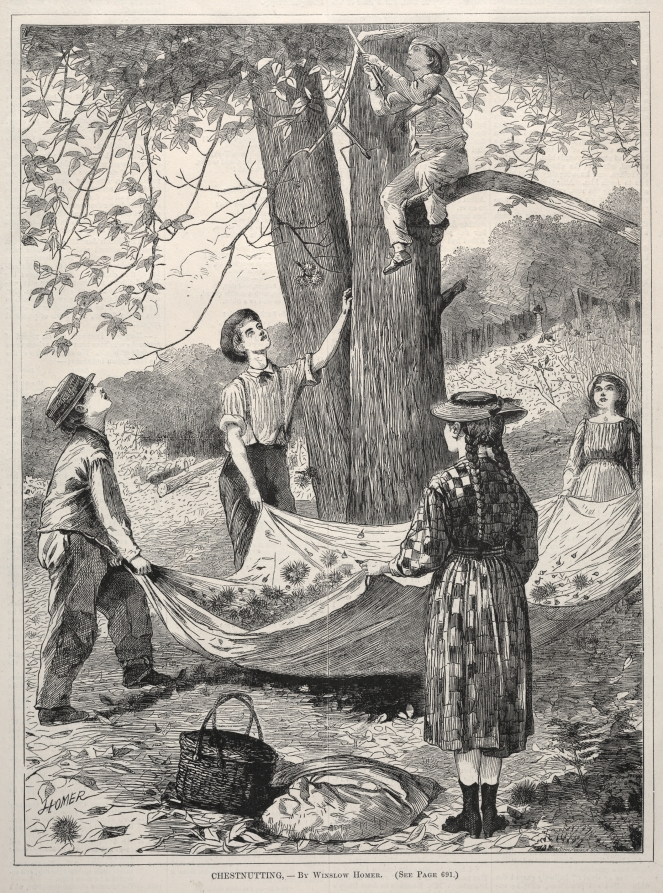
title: Chestnutting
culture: America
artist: Winslow Homer (American, 1836–1910)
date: 1870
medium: wood engraving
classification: Print